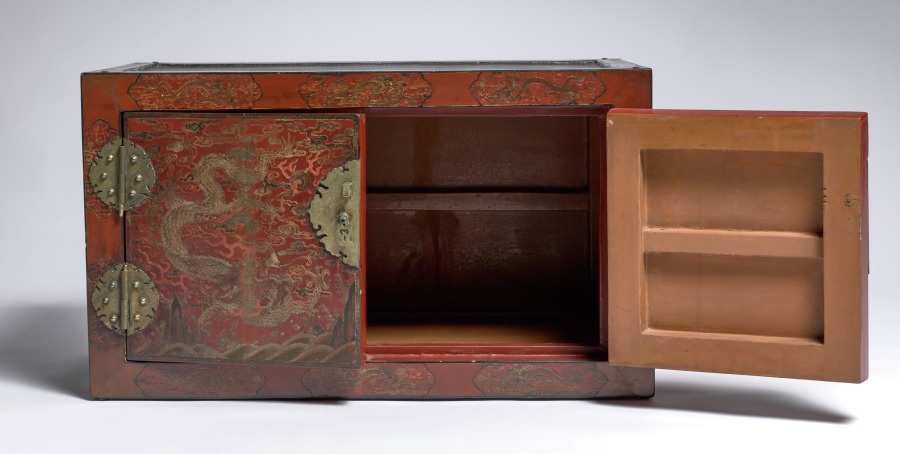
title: Top Chest of a Double Cabinet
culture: China, Ming dynasty (1368-1644) - Qing dynasty (1644-1911)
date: 1600s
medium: red lacquer on wood with pigment and gilding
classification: Furniture and woodwork